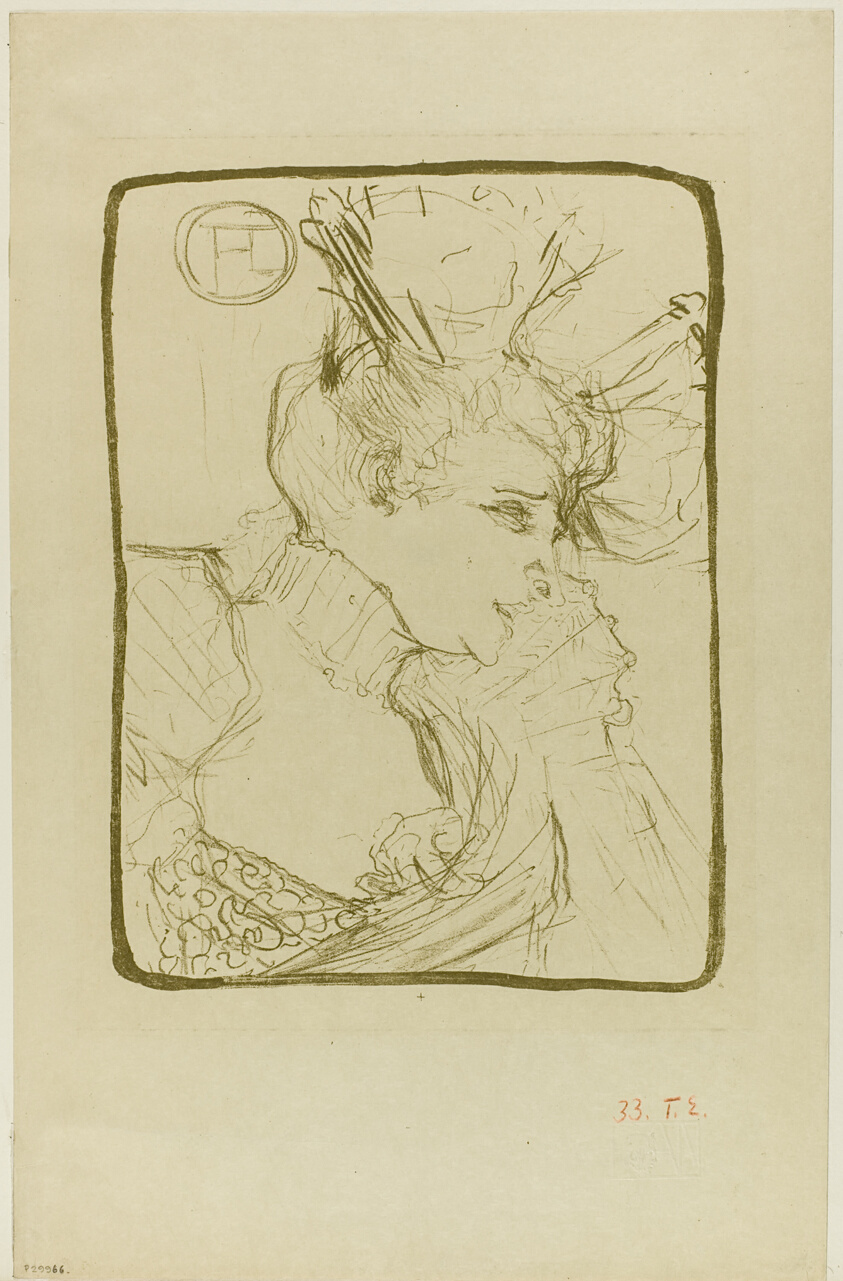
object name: Print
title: Bust of Mademoiselle Marcelle Lender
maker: Henri de Toulouse-Lautrec (French, 1864-1901)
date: 1895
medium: Color lithograph on cream wove paper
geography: France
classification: lithograph; print; prints and drawing